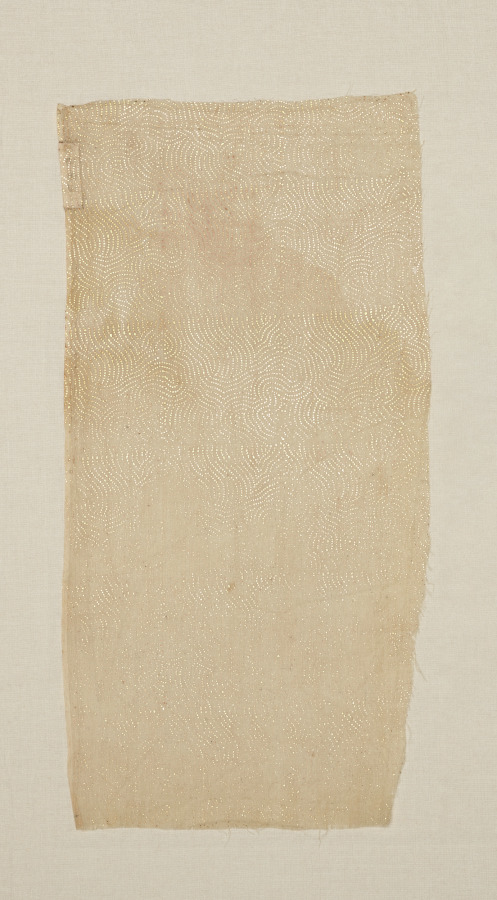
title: Fragment of Draped Apparel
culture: India, Rajasthan or Northern Deccan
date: 1700s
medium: cotton muslin: plain weave; block printed with gold leaf (vavak)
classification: Textile